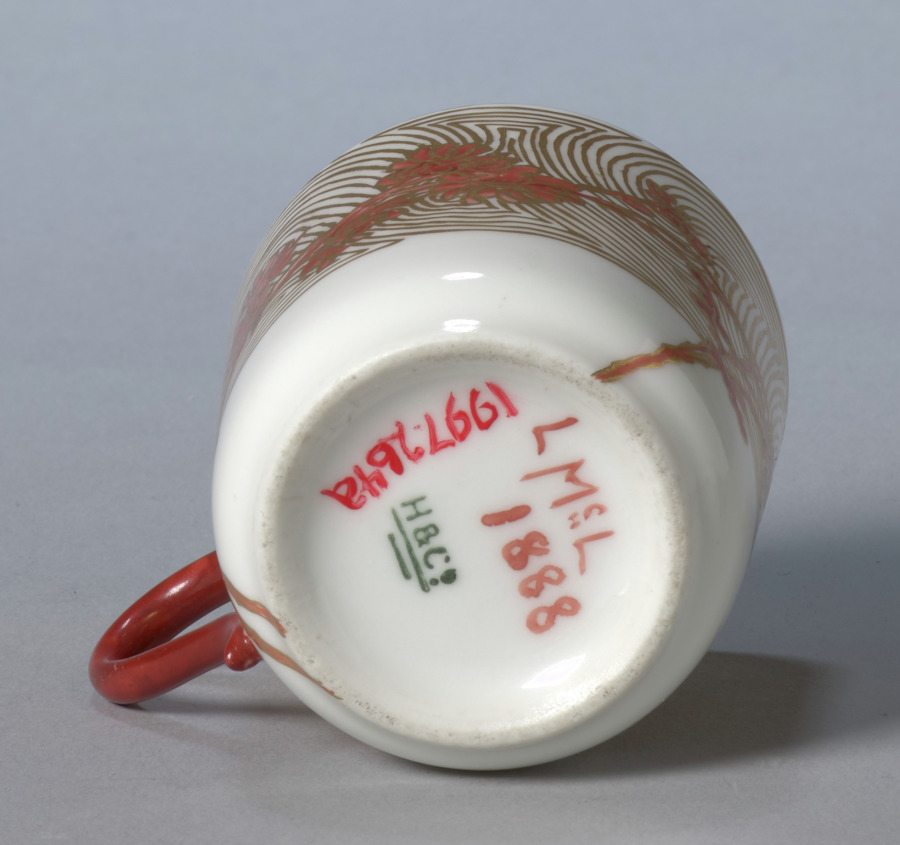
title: Cup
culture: America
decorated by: M. Louise McLaughlin (American, 1847–1939)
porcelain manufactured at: Haviland & Co. (French)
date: 1888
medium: porcelain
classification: Ceramic